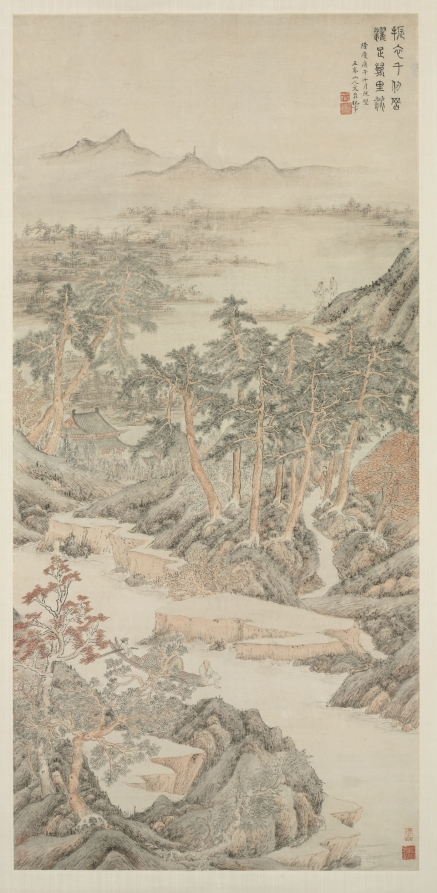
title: Washing the Feet (from the Dusty World)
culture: China, Ming dynasty (1368–1644)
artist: Wen Boren (Chinese, 1502–1575)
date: 1570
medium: Hanging scroll mounted on a panel; ink and color on paper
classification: Painting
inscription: Artist's inscription, signature, and 4 seals: Shaking one's clothes on a thousand-jen peak,/ Washing one's feet in a ten-thousand-li stream. In the gengwu year of the Longqing era [1570], fifteenth day of the tenth month, Wufeng shanren, Wen Boren recorded a special occasion. [2 seals] Wufeng shanren; Wen Boren Te-ch'eng chang. [2 seals, lower right corner] Te-ch'eng; She-shan chang. trans. HR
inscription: 2 additional seals of Zhang Heng 張珩 (1915-1963)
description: A scholar on a boat in the middle ground bathes his feet in the cooling stream. The vast river scene is depicted from a high viewing point. The motif of a scholar washing his feet illustrates the phrase, “When the waters of the Canglang are clear, I wash my capstrings. When the waters of the Canglang are muddy, I wash my feet [only]” (from Songs of Chu, written before 256 BC). The passage evokes the image of the virtuous scholar-official who avoids government service when the ruler is corrupt (the rivers are muddy) and resumes service (washing my capstrings) when the waters are clear. Whether the artist here alludes to unfavorable times of government is not clear.